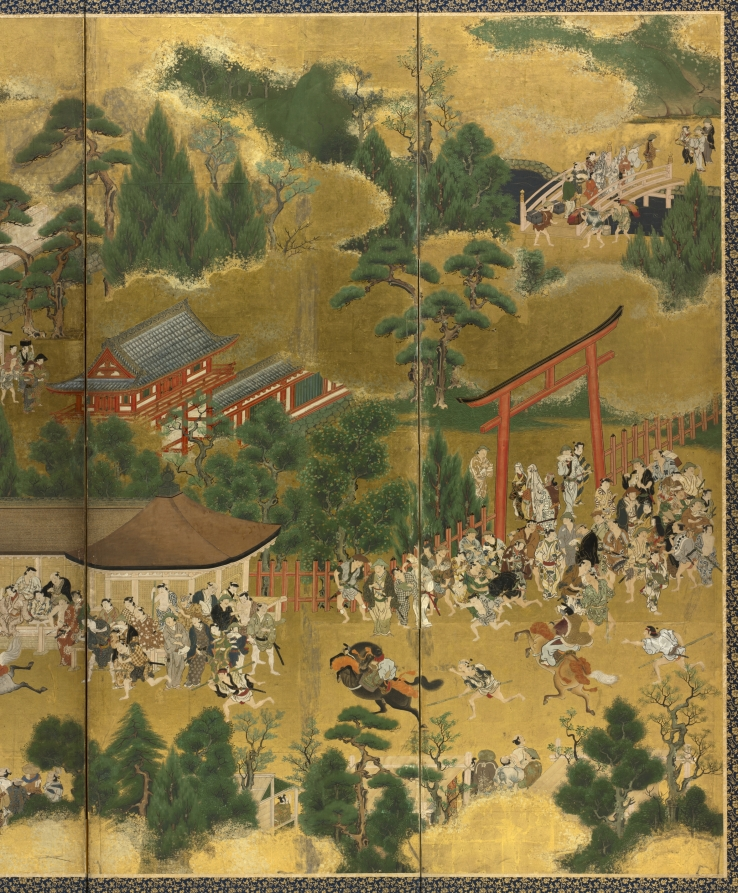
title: Horse Race at the Kamo Shrine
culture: Japan, Edo period (1615–1868)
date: early to mid-1600s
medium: One of a pair of six-panel folding screens; ink and color on gilded paper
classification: Painting